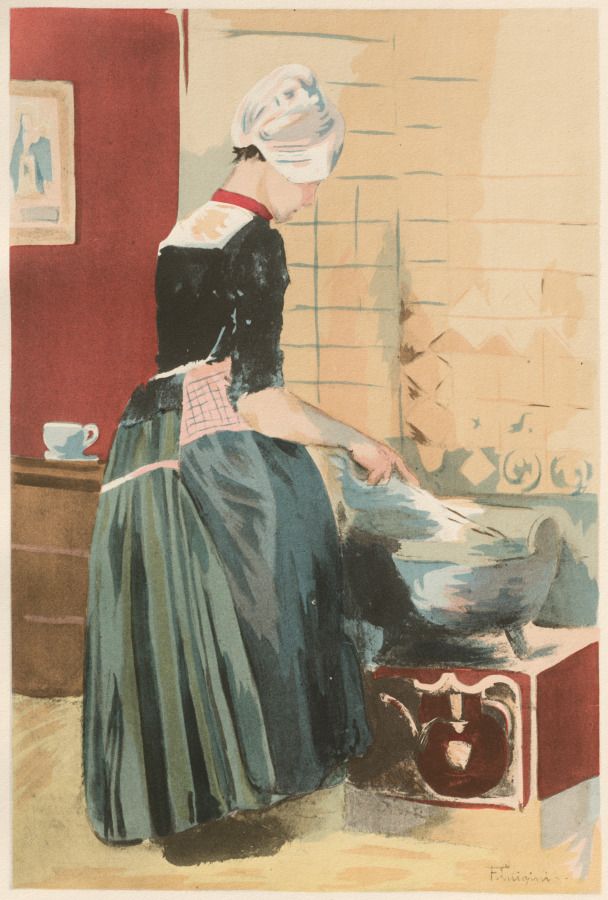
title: La Servante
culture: France, Paris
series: L'Estampe Moderne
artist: Ferdinand Jean Luigini (French, 1870–1943)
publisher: Imprimerie Champenois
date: 1899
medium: Color lithograph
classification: Bound Volume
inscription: In plate, lower right corner of image: F. Luigini-; lower right corner of sheet: blindstamp of l'Estampe Moderne (Lugt 2790).